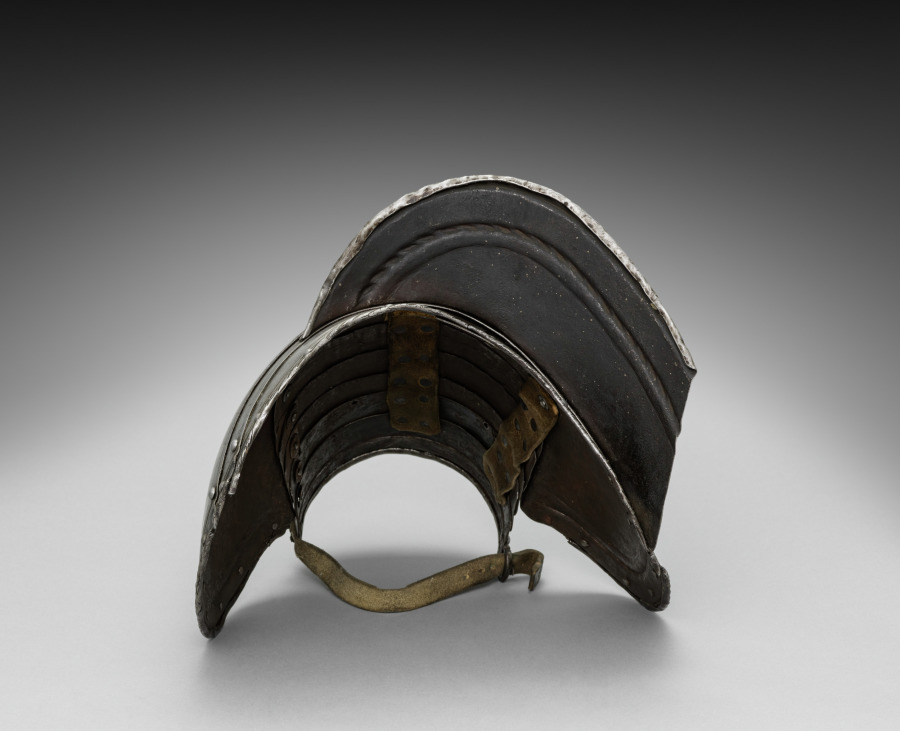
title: Left Pauldron with Guard Brace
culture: Germany, 19th century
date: 1801–1900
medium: steel with black paint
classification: Arms and Armor